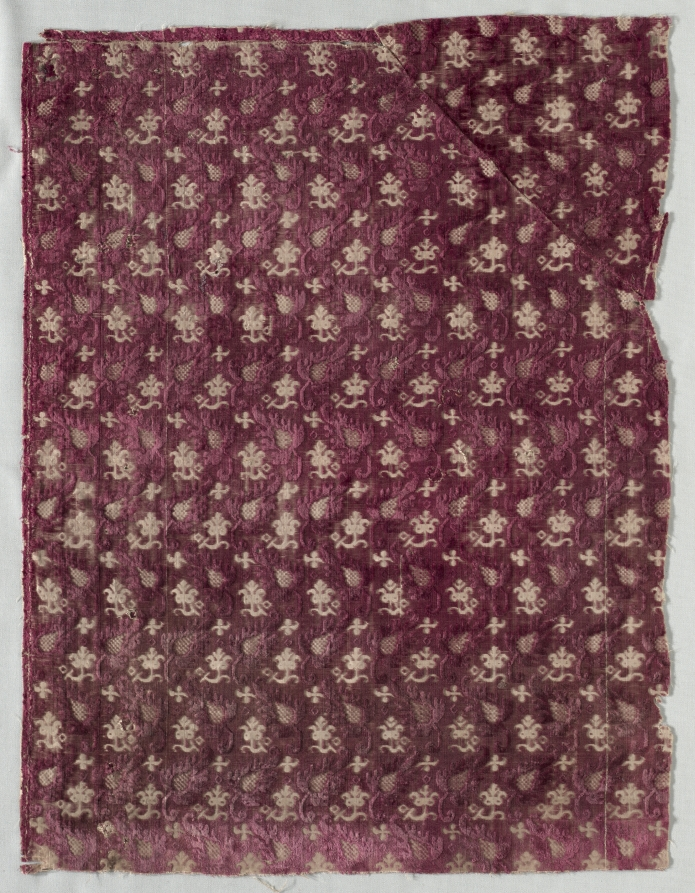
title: Velvet Fragment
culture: Italy, 17th century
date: 1600s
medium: velvet (cut and uncut)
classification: Velvet